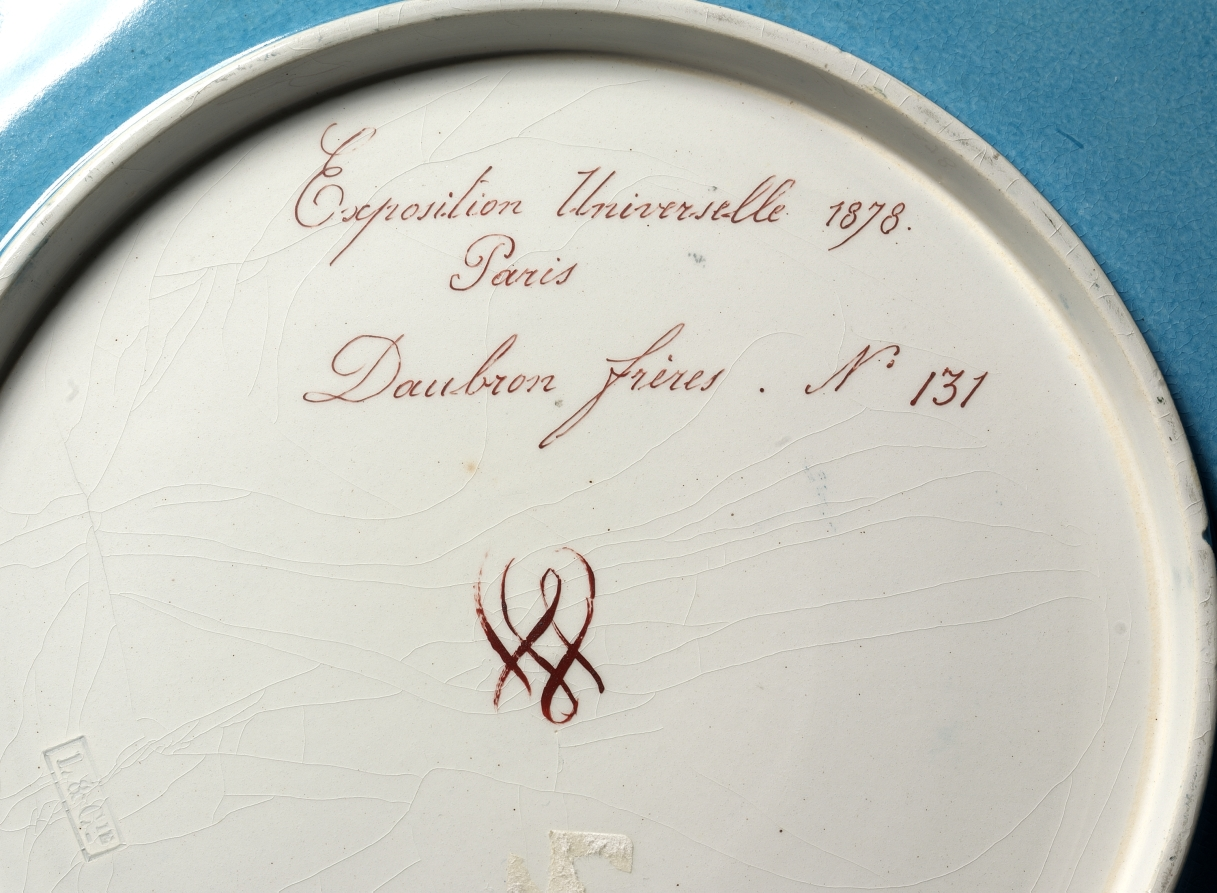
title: Charger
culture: France, 19th century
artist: Daubron frères (French)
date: 1878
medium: glazed and gilt earthenware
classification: Ceramic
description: This decorative charger is an exceptional example of the Japanese taste in 19th-century French decorative arts. Influenced by cloisonné exported by Japan when the country opened it borders to the West in the 1850s, this charger features parrots in lush foliage before a blue background that imitates cloisonné. The exceptional nature of the enamel decoration is due to the fact that this charger was created by Daubron Frères for exhibition at the 1878 Paris world's fair. An inscription on the back documents the inclusion of this particular piece in the fair.